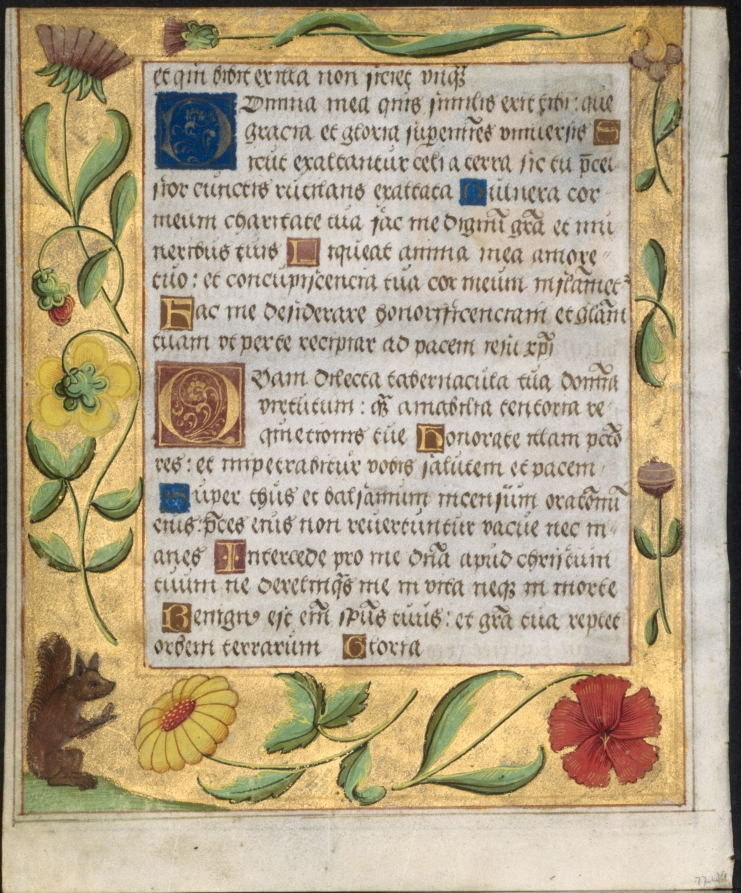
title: Leaf from a Psalter and Prayerbook: Ornamental Border with Flowers and Squirrel (verso)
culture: North Germany, Hildesheim (?), 16th century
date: c. 1524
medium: ink, tempera and liquid gold on vellum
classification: Manuscript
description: This leaf and the one nearby were excised from the same prayer book. They reveal the favored secular motifs that include decorations with animals, peasants, and domestic activities such as cooking. Here a woman is shown kneading bread. A composite text combining features of a psalter, a collection of psalms or religious verses, and a prayer book, it was used during Mass and other services. The original book was a highly personalized volume written and illuminated in or around the city of Hildesheim in Northern Germany, as suggested by the prominent inclusion of Saint Godehard, Bishop of Hildesheim (died 1038), in the calendar (not shown).